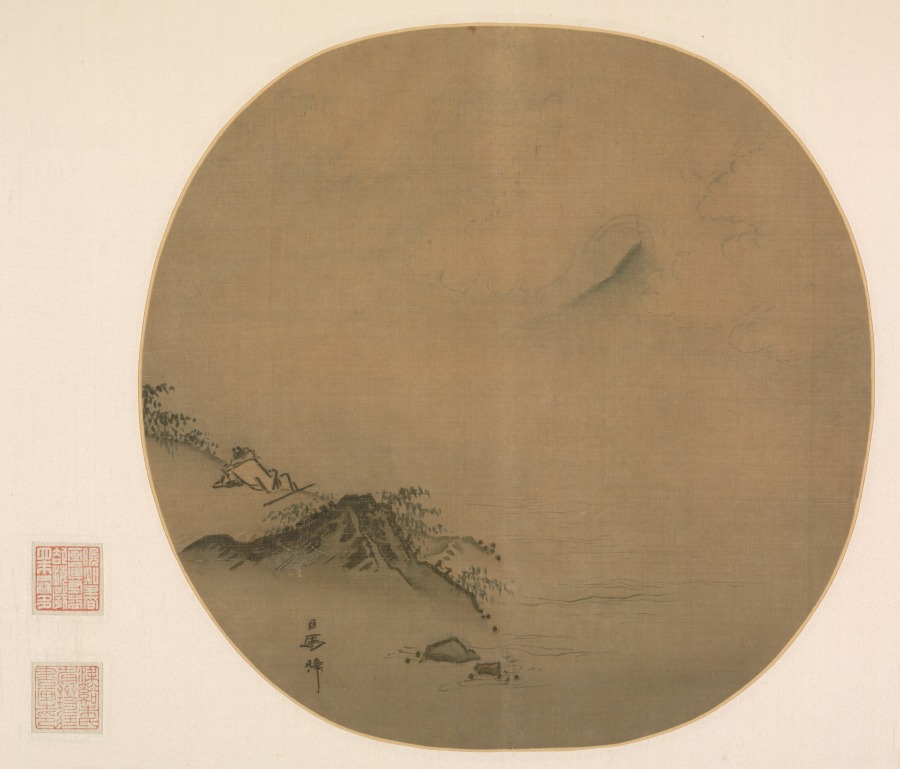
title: Scholar Reclining and Watching Rising Clouds; Poem by Wang Wei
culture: China, Southern Song dynasty (1127-1279)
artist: Ma Lin (Chinese, c. 1185–after 1260)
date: c. 1256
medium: Album leaf; ink on silk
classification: Painting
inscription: Inscription for 1961.421.1: Artist's signature: 臣馬麟 Your servant, Ma Lin. 2 seals on mounting of Chu Sheng-chai (20th c.).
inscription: Inscription for 1961.421.2: The 2 lines of poetry from right to left read: "I walk unto where waters end/ And sit down to watch when clouds arise."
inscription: Seals and Inscription for 1961.421.2: The top gourd-shaped seal has the cyclical date "bingchen" (丙辰 1256); the lower square seal is the Seal for Imperial Calligraphy. The inscription between the two imperial seals reads, "Presented to Chung-kuei".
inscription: Seals and Inscription on facing leaf for 1961.421.2: Inscription by Zhang Daqian (1899–1983). 1 seal of Chu Sheng-chai (20th Century) remounted onto the facing leaf to the left of the square calligraphy.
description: Poem and painting, once mounted together as one fan, exemplify the collaboration between imperial patron and court painter. Emperor Lizong’s calligraphy cites a verse from Wang Wei’s (701–761) poem, Walking to where the water ends, I sit and watch when clouds arise. Ma Lin’s response is this painting. At the water’s edge, a scholar reclines by a large rock. The view leads across the empty middle ground to a distant mountain. With sparse ink and subtly graded washes, Ma Lin visualizes the poetic verse. The painting suggests the impact of Chan aesthetics through interaction between the palace, literati-officials, and monasteries around Hangzhou.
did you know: Ma Lin was the son of Ma Yuan, the artist renowned for his unique composition and often referred to as "One-corner Ma."